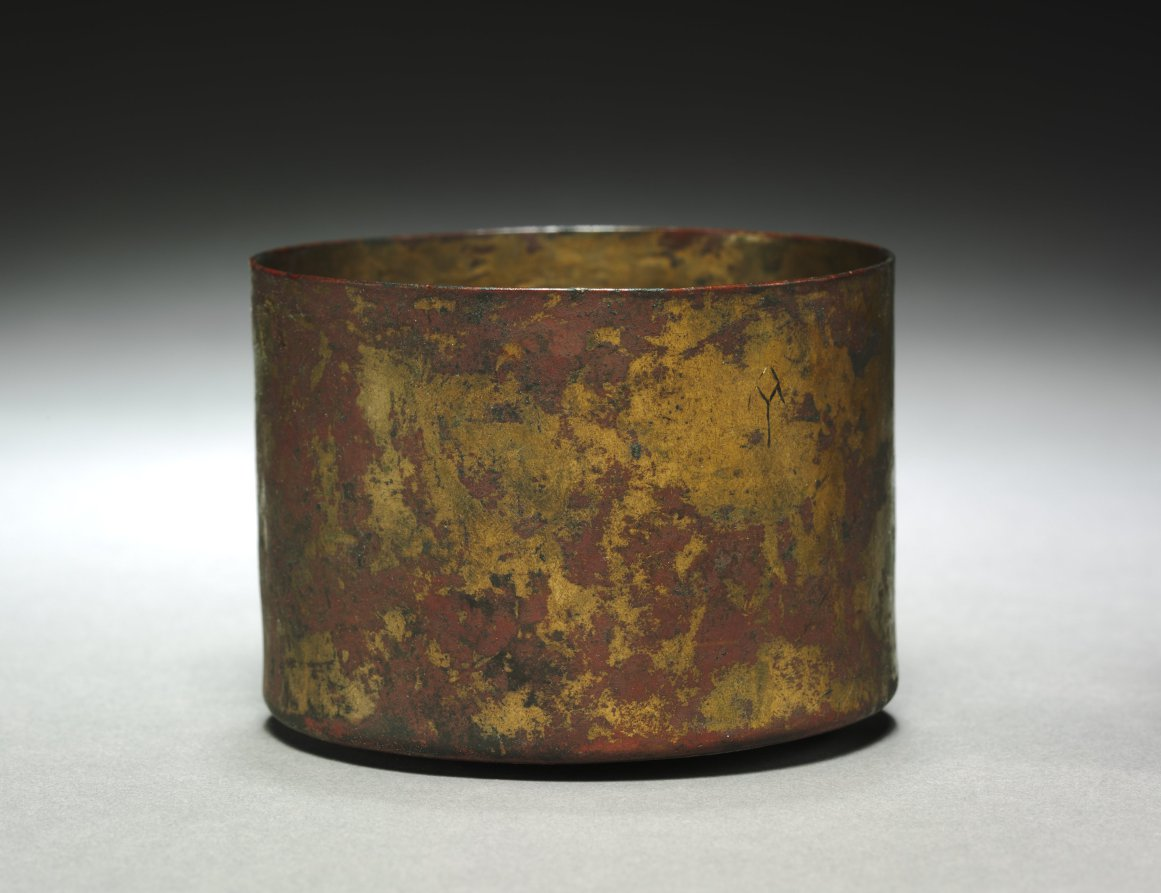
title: Cylindrical Bowl or Jar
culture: Egypt, Roman Empire or modern forgery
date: 30 BCE–395 CE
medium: bronze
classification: Vessels